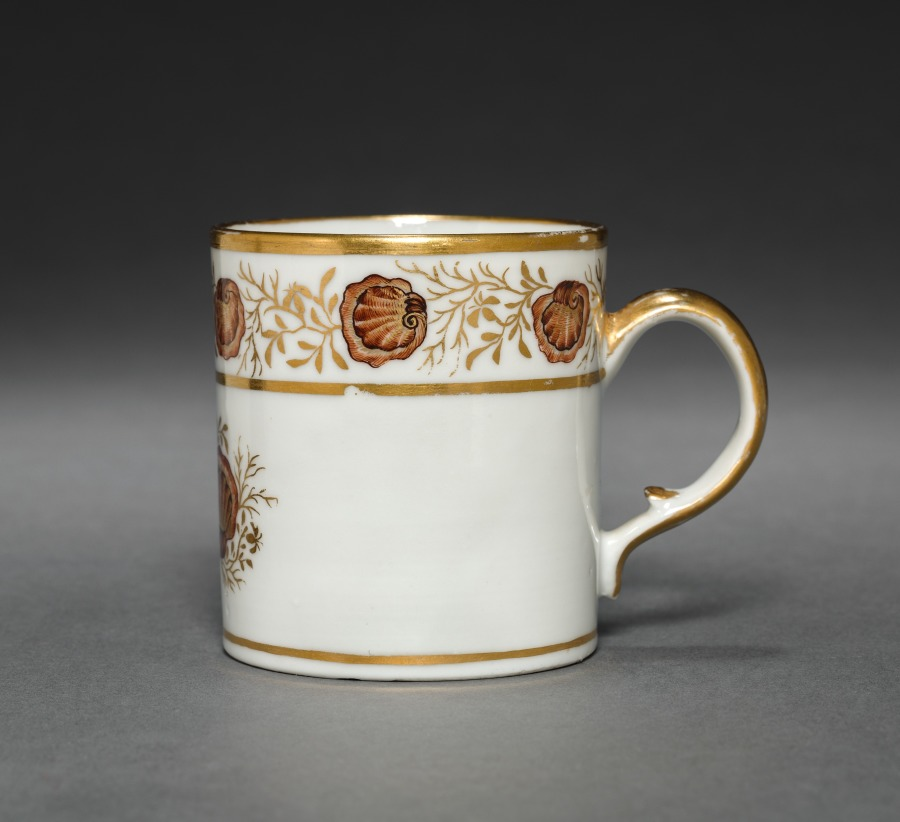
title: Cup from Oliver Wolcott, Jr. Tea Service (5 of 6)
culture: Chinese Export porcelain, late 18th-early 19th century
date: 1785–1805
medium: porcelain, sepia enamel, gold leaf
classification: Ceramic